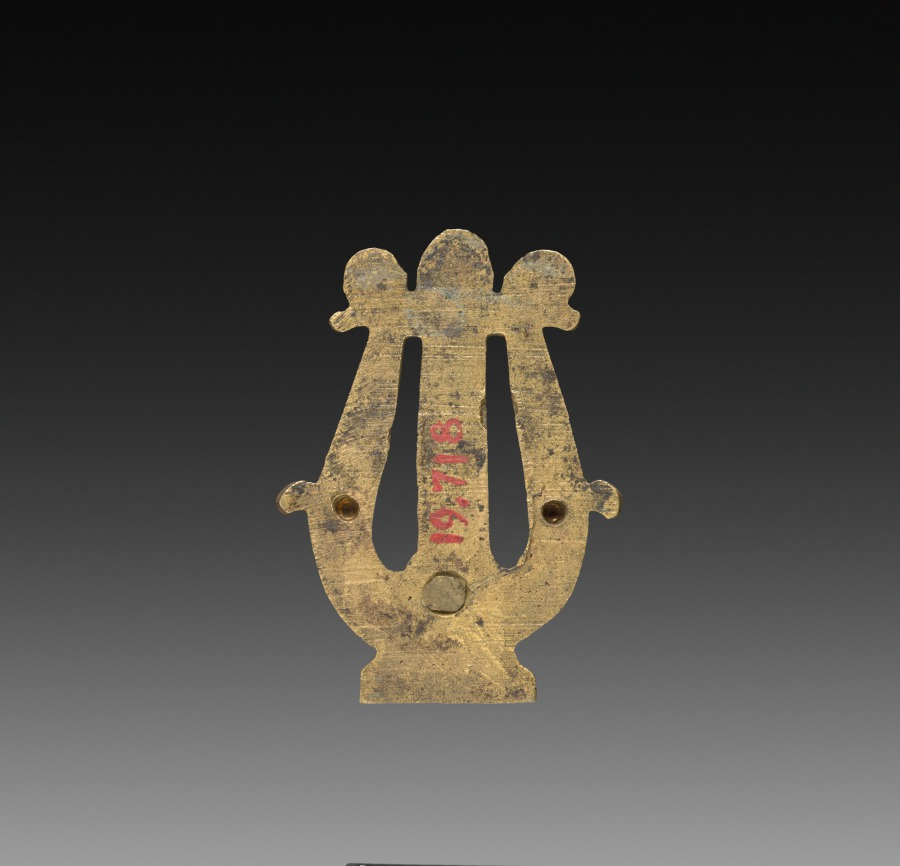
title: Ornamental Hook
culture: France, early 19th century, Empire Style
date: early 19th century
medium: gilt bronze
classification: Metalwork